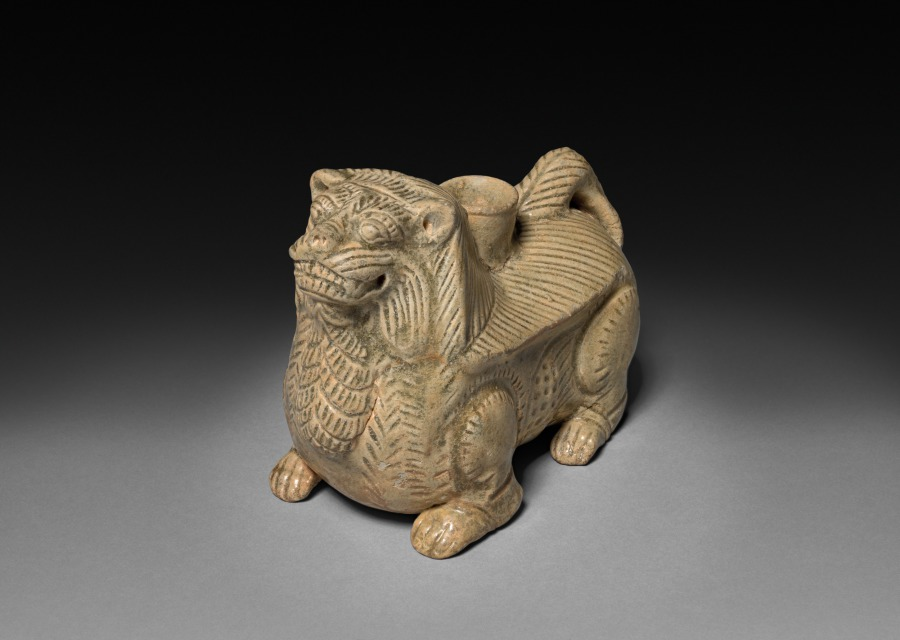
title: Candlestand in the Shape of a Chimera Bixie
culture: China, Western Jin dynasty (265-316 CE)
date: 265–316 CE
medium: Glazed stoneware with molded and incised decoration, Yue ware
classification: Ceramic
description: The candlestand in the shape of a chimera or bixie (a fantastical hybrid creature that was believed to ward off evil spirits) was molded in two parts. Incisions on both sides of the feline body suggest wings. Stone bixie placed in front of tomb entrances are prominent among the Six Dynasties kings buried in Nanjing. Candlestands in the form of chimera were found in tombs but may have been used in daily life too.